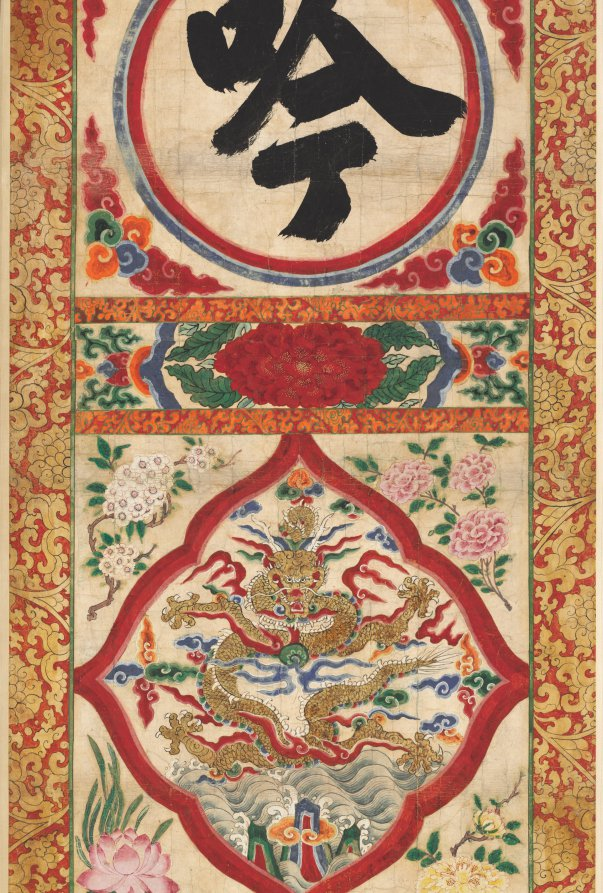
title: Painted Panel of Character "Recite"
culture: Korea, Joseon dynasty (1392–1910)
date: early 1900s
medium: hanging scroll, ink and color on paper; unmounted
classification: Painting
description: This set of four colorful hanging scrolls may have been used in an outdoor Buddhist ritual to evoke heavenly blessings. Each hanging scroll bears four different character; tiger, dragon, whistle, and recite. Traditionally, tiger and dragon belong to the four directional guards, respectively west and east.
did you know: This set of four colorful hanging scrolls may have been used in an outdoor Buddhist ritual to evoke heavenly blessings.